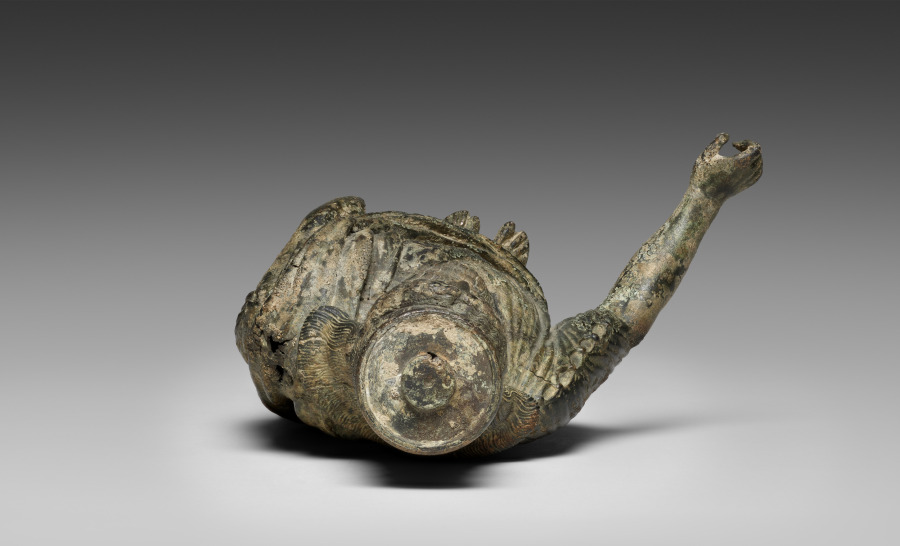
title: Statuette of Dionysos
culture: Italy, Roman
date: 50 BCE–50 CE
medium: bronze and silver and traces of gilding, hollow cast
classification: Sculpture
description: This bronze figure of Dionysos, the god of wine, theater, and the mysteries, is presented in a style recalling Archaic Greek art, most noticeably in his stiff pose and trimmed beard. The more naturalistic folds of his garment speak to a later date, in the Roman period. The disk attached at the top of the head suggests that this figure was once part of an ornate piece of furniture, perhaps a stand or support. In his right hand, the god likely held a kantharos or other attribute. He would have been further embellished with inlaid copper (lips), silver (whites of eyes), and perhaps gilding (garment).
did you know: Over his long, thin garment, Dionysos wears an animal skin, fastened on his left shoulder.